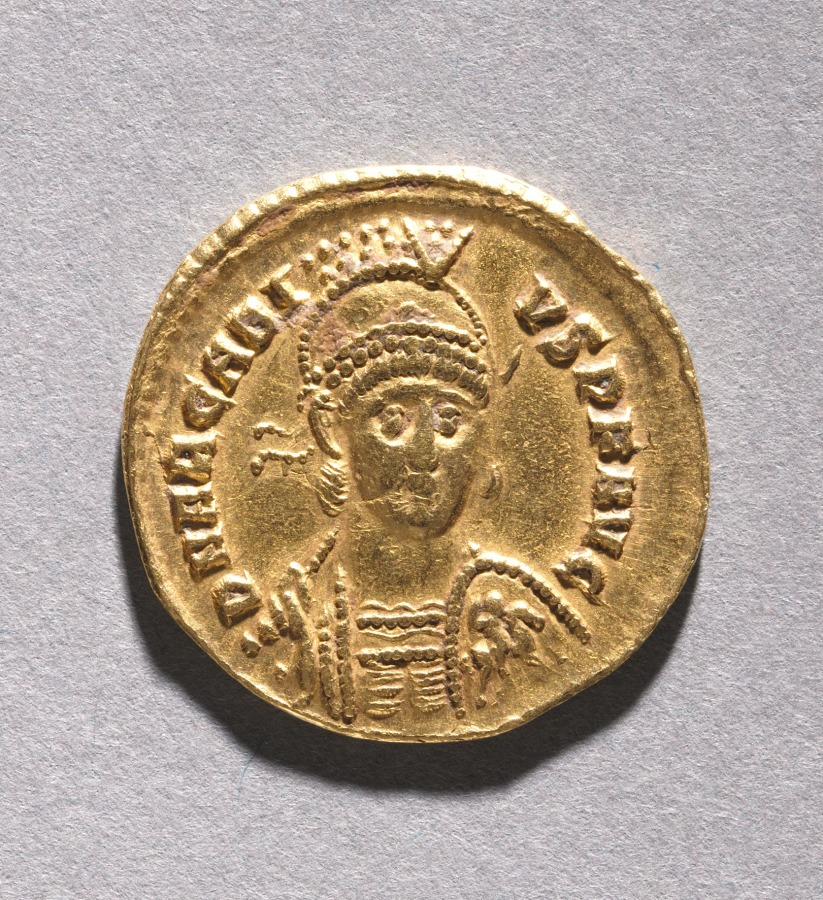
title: Tremissis of Honorius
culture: Byzantium, Ravenna, Byzantine period, late 4th-early 5th Century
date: 395–423 CE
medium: gold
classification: Coins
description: Byzantine Gold Coins The vast number of surviving Byzantine coins attests to the level of trade across the empire. Controlled and supervised by the emperor, the producers of coins took care to represent his authority and reflect his stature. Talented artists were recruited to engrave the dies (molds) used for the striking of coins. Emperors increasingly came to include their heirs and co-emperors on their coinage, as well as other family members or even earlier rulers. Coins were recognized, then as now, as small, portable works of art. With their inscriptions and images, Byzantine coins provide valuable documentation of historical events and a record of the physical appearance of the emperors. The coins shown here include the solidus, the basic gold coin of 24 karats; the tremissis, a gold coin of one-third the weight and value of the solidus; and the nomisma, which in the 10th century replaced the solidus as the standard gold coin.